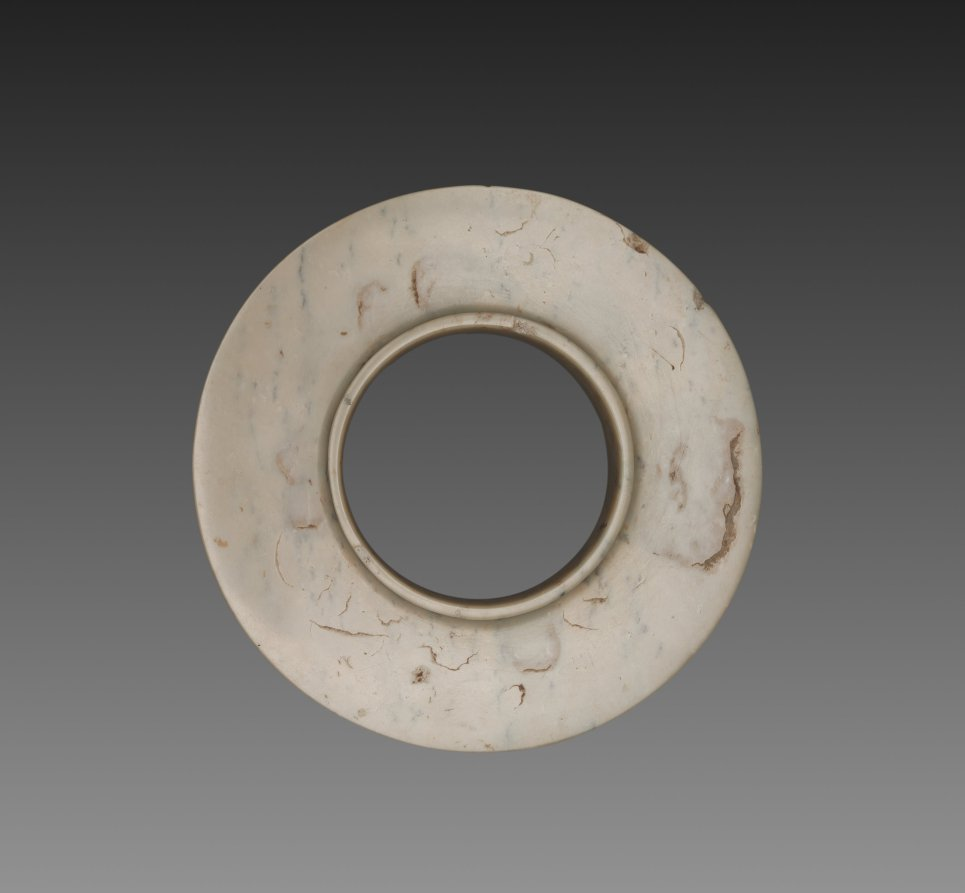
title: Collared Disk (Huan)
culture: China, Shang dynasty (c. 1600–c. 1046 BCE)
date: c. 1600–1050 BCE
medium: jade (nephrite)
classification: Jade